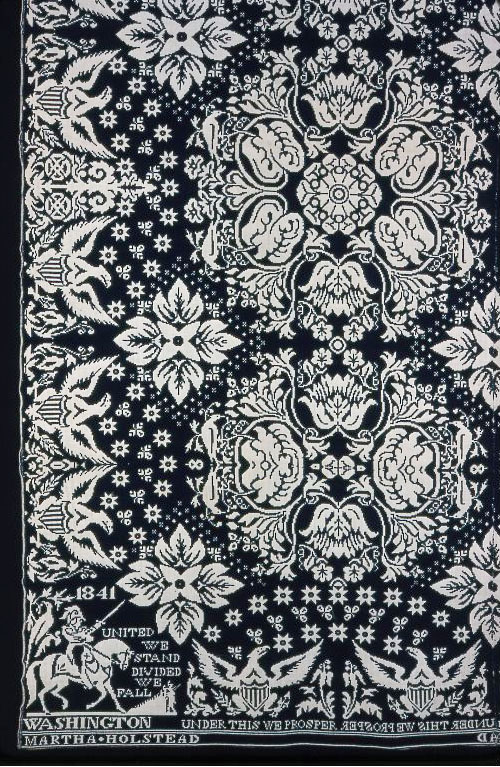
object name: Textile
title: Coverlet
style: 19th century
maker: James Cunningham (American, born Scottish, c. 1797-after 1865); United States, New York, Oneida County, New Hartford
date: 1841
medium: Cotton and wool, plain weave double cloth; woven on loom with Jacquard attachment; two loom widths joined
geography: Oneida County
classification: weaving - coverlet; coverlet; weaving; textile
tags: washington, foliage, prosperity, birds, stars, shields, eagles, wreaths, medallions, flowers, coverlet